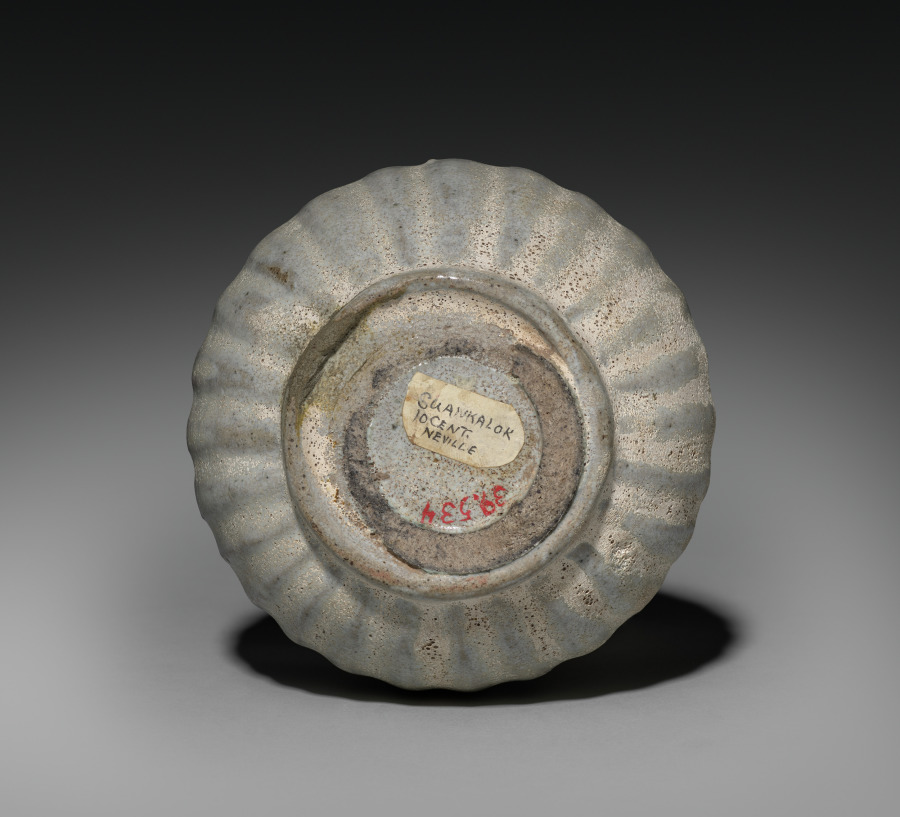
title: Jar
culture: Siam, Sawankhalok ware, late 13th-14th Century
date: late 1200s-1300s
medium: stoneware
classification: Ceramic